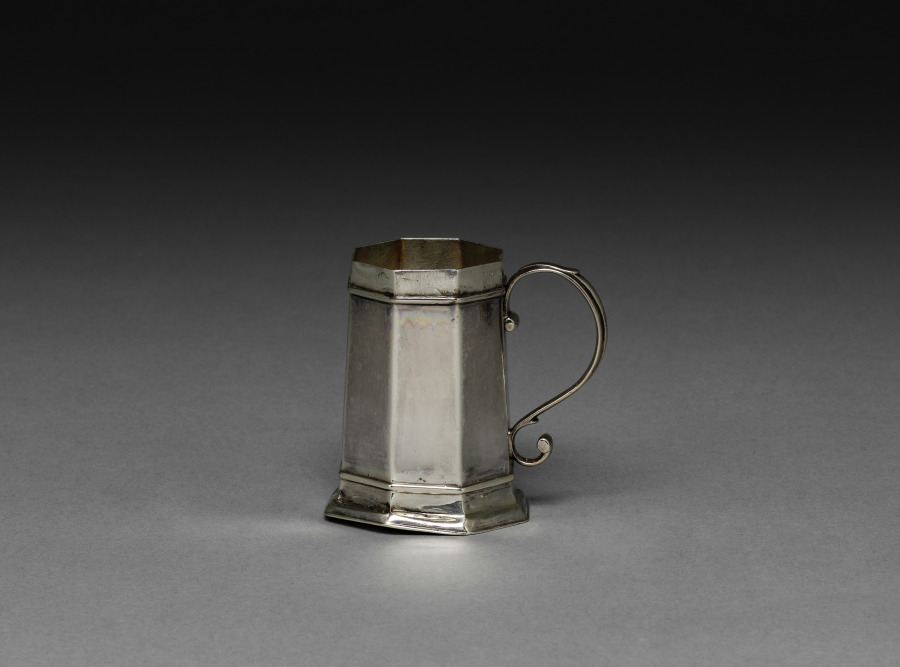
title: Caster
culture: America, Massachusetts, Boston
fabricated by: Jacob Hurd (American, 1702–1758)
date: 1743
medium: silver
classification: Silver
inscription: engraved: "The Gift of /Mrs J. Ross/to H.T/1743" and "J.E.C." (later, in script) on bottom. Small star near scam of cover band.